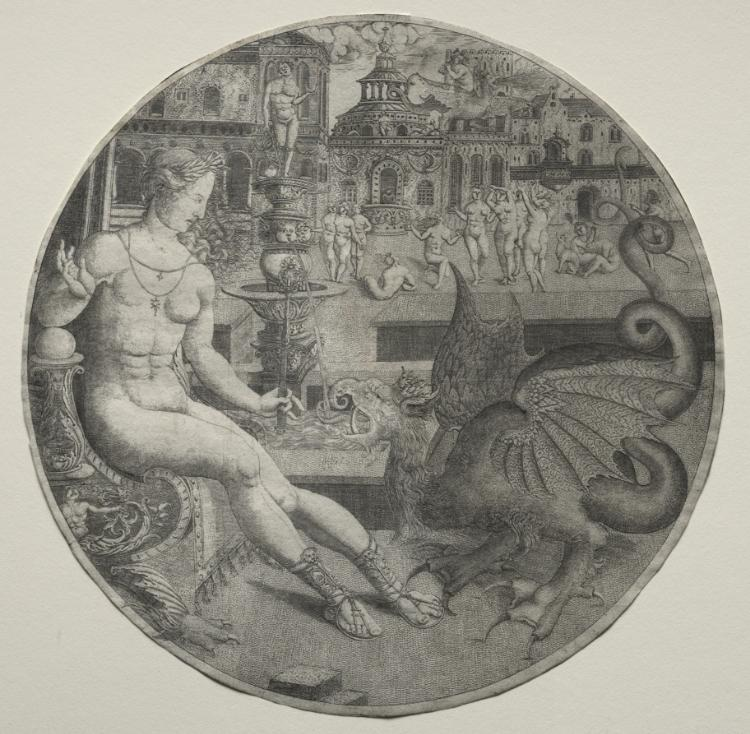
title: Naked Woman and a Dragon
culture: Netherlands, 16th century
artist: Allaert Claesz. (Netherlandish, active c. 1520–26)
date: 1523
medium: engraving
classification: Print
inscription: VERSO, lower center, in graphite (various inscriptions): 2254 ; N 112 ; 3.-- ; 2648 ; lower center, in graphite: Alart Claezsen / B. 34 sans le monogramme / et sans l'amore indique / par Bartsch. / cata: rara